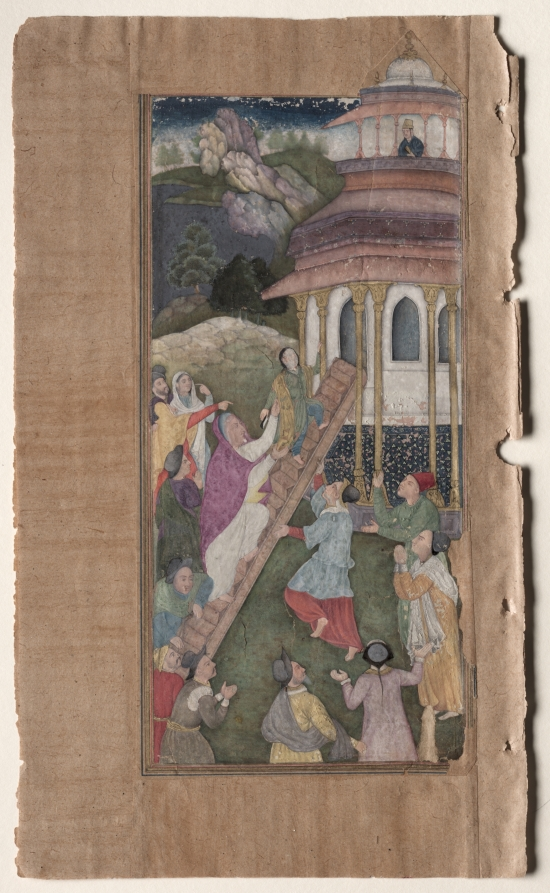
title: Mary ascends the stairs to the temple, from a Mirror of Holiness (Mir’at al-quds) of Father Jerome Xavier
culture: Mughal India, Allahabad, made for Prince Salim (1569–1627)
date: 1602–4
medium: Gum tempera, ink, color, and gold on paper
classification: Manuscript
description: Three-year-old Mary bounds up the stairs of the temple, eager to begin her education. Onlookers gesture in surprise. In the background the rocks have been cleverly shaded to look like faces—a Persian technique of visual double-entendre that the Mughals admired and adopted. This work is the second of the 27 surviving paintings made for this manuscript. The first, a scene of Mary’s birth, is in a private collection in Europe. Mary’s face had been painted with a fragile white paint, which has fallen off. Now only the underdrawing remains visible.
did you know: Mary’s instructor awaits her, book in hand, at the top of a temple of learning.